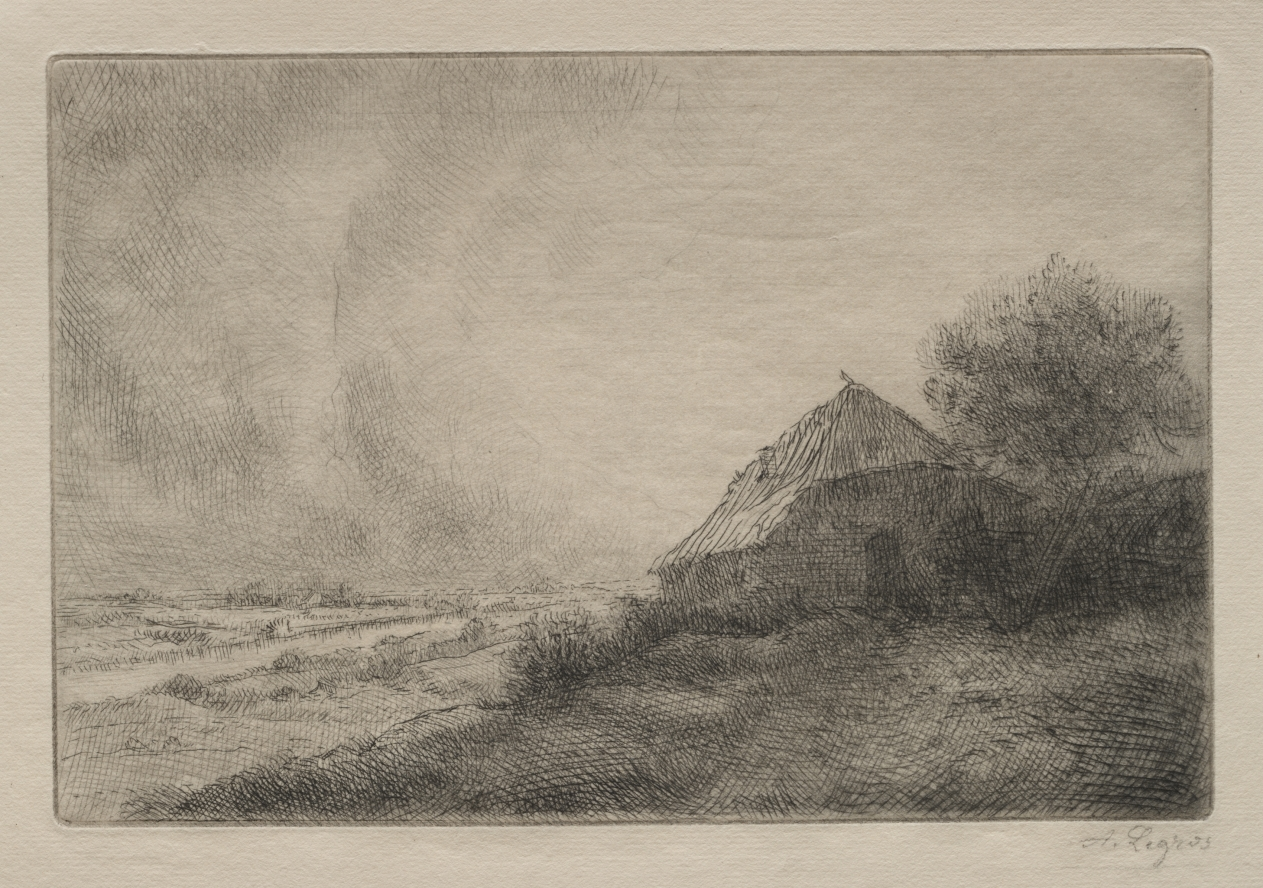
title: Hovel on the Hill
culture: France, 19th century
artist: Alphonse Legros (French, 1837–1911)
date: c. 1857–1911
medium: drypoint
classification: Print